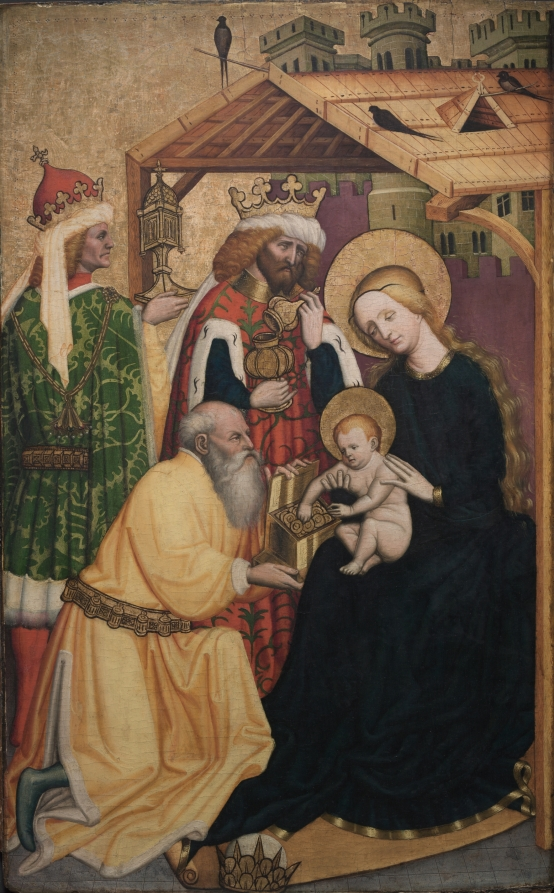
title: Adoration of the Magi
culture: Germany, born Ensingen, active Austria, 15th century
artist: Konrad Laib (German)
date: early 1440s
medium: oil on panel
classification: Painting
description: Laib was a German painter who spent most of his career in Austria. Proof that he came to Salzburg at an early age is suggested by the stylistic affinity of many of his works with Salzburg painting, including this one.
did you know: A companion piece to this one is in the Freising Seminary in Germany and depicts the Nativity.